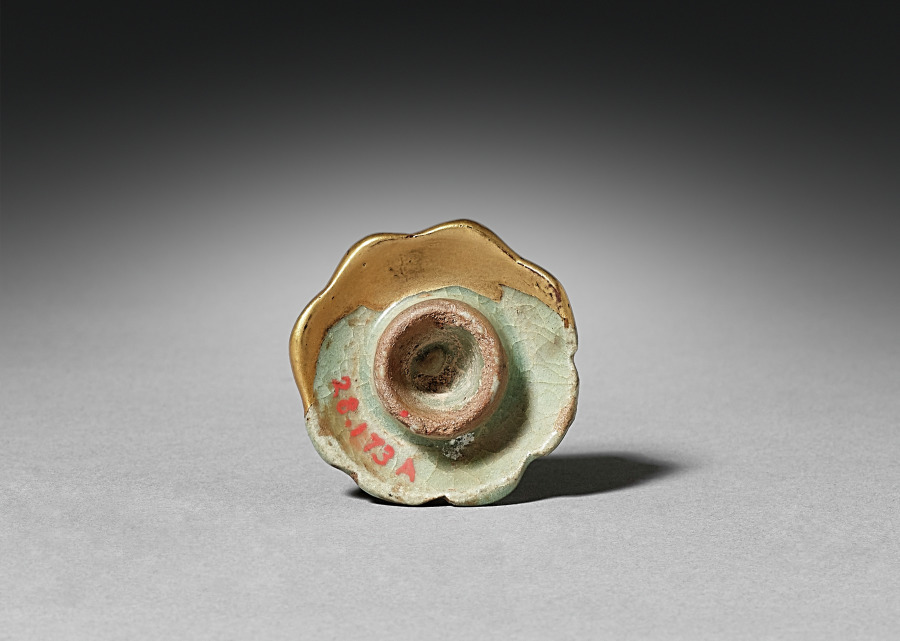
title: Melon-shaped Wine Ewer (lid)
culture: Korea, Goryeo dynasty (918–1392)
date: 1100s-1200s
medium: celadon ware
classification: Ceramic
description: Many celadon ceramics, such as these two miniature pots, have been repaired with gold lacquer. Termed kintsugi (literally meaning “gold joinery”) in Japanese, this restoration method highlights broken parts with glittering gold mixed with lacquer. Initiated in 15th-century Japan, the technique follows a popular aesthetic concept called wabi-sabi, which finds beauty in imperfect things. Goryeo celadons were considered rare treasures among early 20th-century Japanese collectors; thus, their broken condition is brilliantly highlighted in gold lacquer, as seen here in the repaired spouts, handle, and lid.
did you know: This miniature wine pot was buried in a tomb for the soul of the deceased.